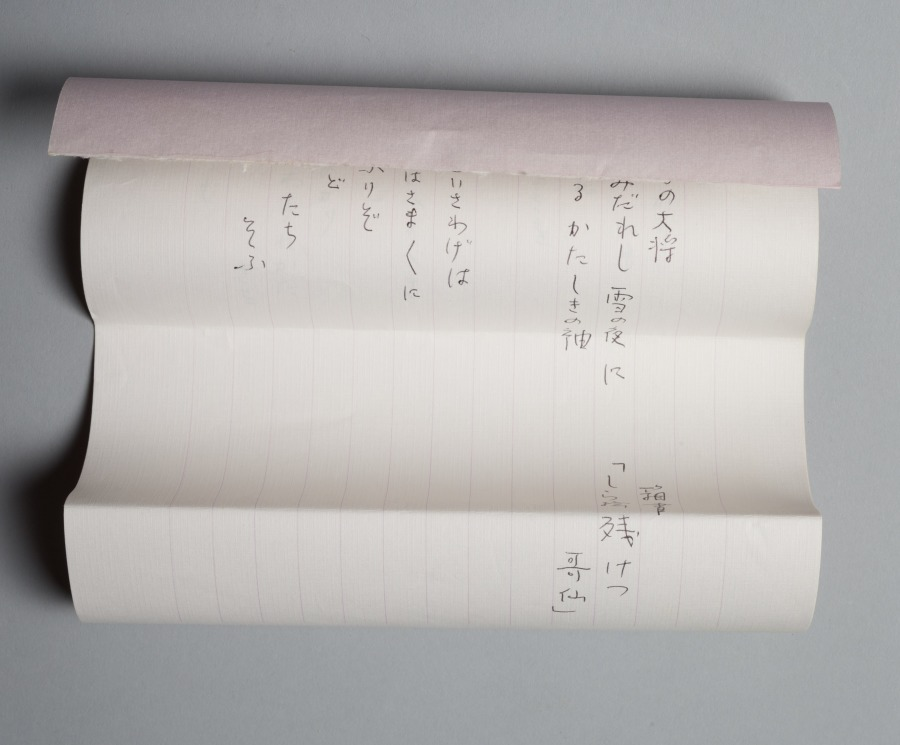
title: Section of an Illustrated Tale of Genji Poetry Contest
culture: Japan, Muromachi period (1392–1573)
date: 1400s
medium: section of a handscroll mounted as a hanging scroll; ink on paper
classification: Painting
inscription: 四十六番 左 ひげくろの大将 心さえ空にみだれし雪の［も」夜に ひとりさえつるかたしきの袖／ 四十七番 うきことを思ひさわ げばさまざまに くゆるけむりぞ いとど たち そふ／ 四十八番 すがくれてかず にも あらぬ かりのこを いづかたにかはとりかくすべき／ 右 雲井のかり かぎりとてわすれがたきを わするるも こや世に なびくこころな るらむ／ あさきなを いひ ながしける かわ ぐちは いかが もらしし せきのあらがき／ あわれをもいかに しりてか なぐさ めむ あるや 恋しき なきや かなしきに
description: This hanging scroll was once part of a handscroll depicting a waka (thirty-one syllable verse) poetry contest between characters from the 11th-century literary classic Tale of Genji. In this section, a woman known informally as Kumoi no kari, or “Goose in Fog,” after a lovelorn line she hums in the novel, is pitted against Higekuro no taishō, or “General Blackbeard.” Three of his poems, numbered 46 to 48, from “The Handsome Pillar” chapter appear over his image. The subsequent three poems inscribed above Kumoi no kari are presented as her “responses,” and come from "The Plum Tree Branch", “New Wisteria Leaves”, and "Evening Mist" chapters.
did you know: General Blackbeard laments having smelly ash poured upon him by his angry wife in one of the poems.